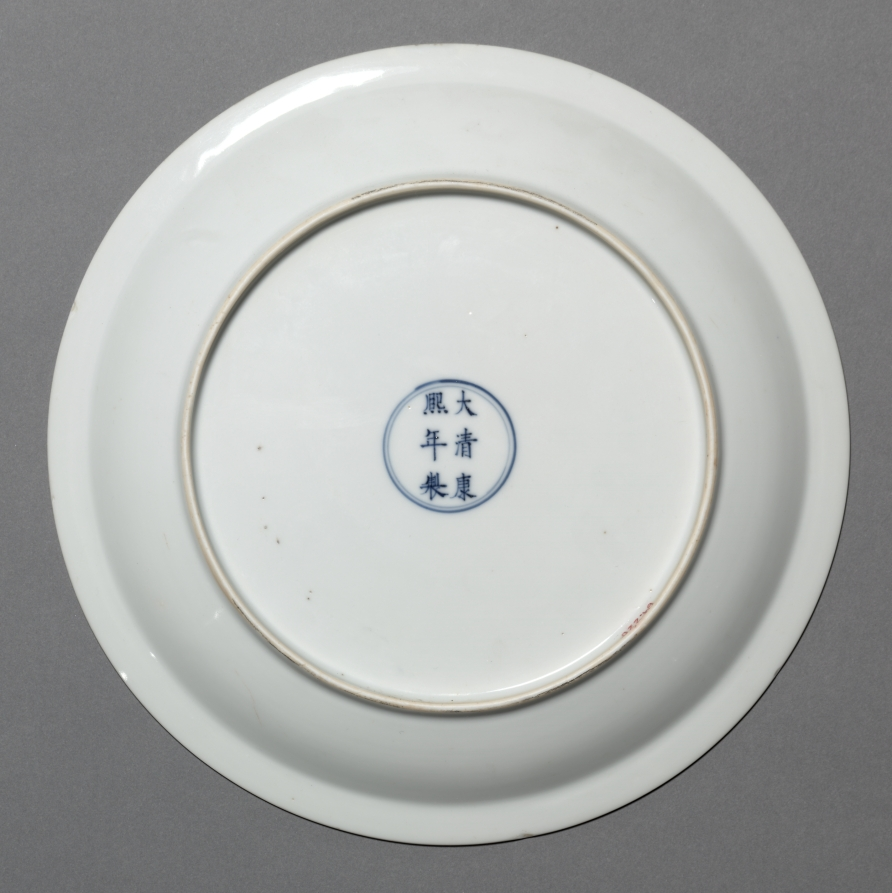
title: Dish with Female and Attendant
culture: China, Jiangxi province, Jingdezhen, Qing dynasty (1644-1911), Kangxi mark and period (1662-1722)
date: c. 1713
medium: porcelain with famille verte overglaze enamel decoration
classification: Ceramic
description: On the flattened rim of this dish is a band of ironred enamel decoration with the Chinese characters Wanshou wujiang, meaning "Long life without limit." This piece belongs to a set of particularly fine porcelains with the same inscription, which are thought to have been made for the Kangxi emperor's 60th birthday in 1713.